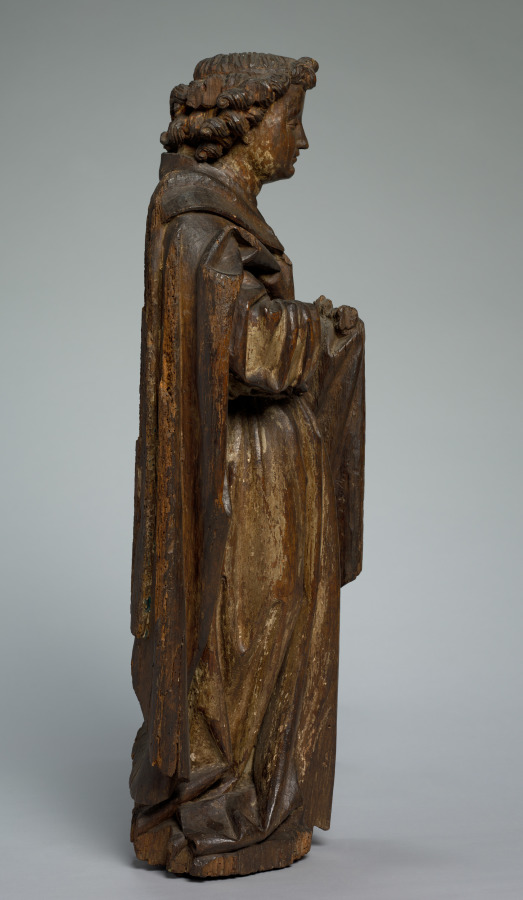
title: Angel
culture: Bruges?, Belgium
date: c. 1430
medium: oak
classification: Sculpture